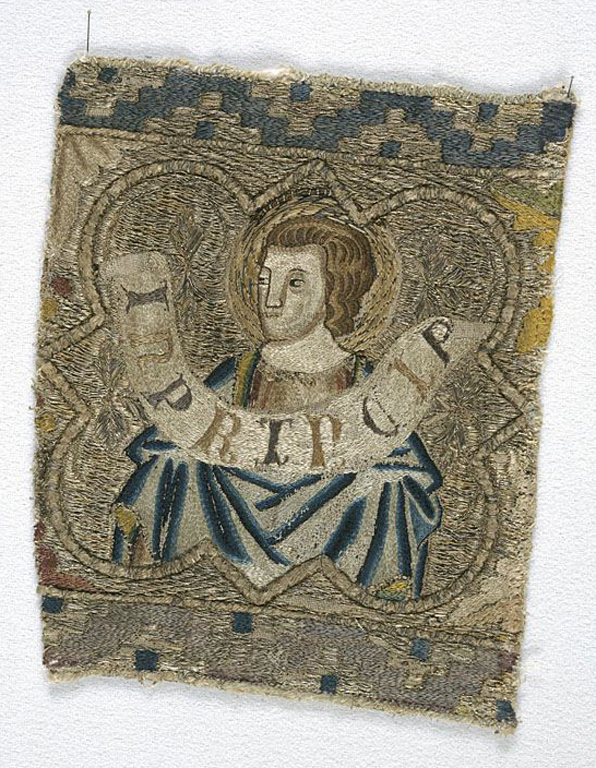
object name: Religious/Ritual Object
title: Fragment from an Orphrey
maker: Italy, Florence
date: 1360s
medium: Linen, plain weave; underlaid with linen, plain weave; embroidered with silk, gilt- and silvered-metal-strip-wrapped silk in split and surface satin stitches; laid work, couching, and padded couching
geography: Florence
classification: textile; needlework (visual works); liturgical; ritual objects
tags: religious scenes